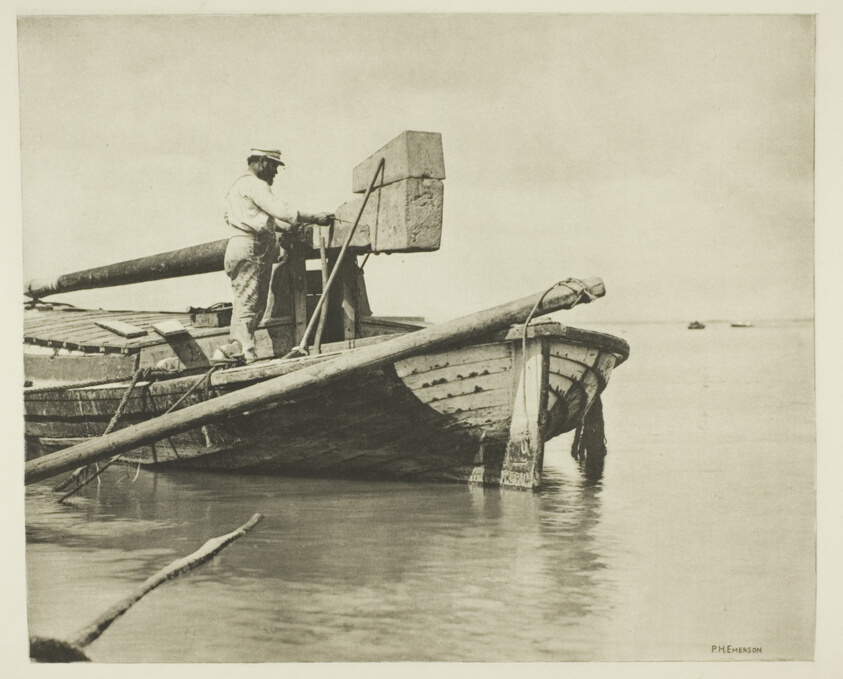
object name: Photograph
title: A Way Across the Marshes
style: 19th century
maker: Peter Henry Emerson (English, born Cuba, 1856–1936)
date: c. 1883/87, printed 1888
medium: Photogravure, pl. XIX from the album "Pictures of East Anglian Life" (1888)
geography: England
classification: photogravure; photomechanical process; photography; photograph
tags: Collected by Hugh Edwards, Pictures of East Anglian Life, Seat of War in the Crimea